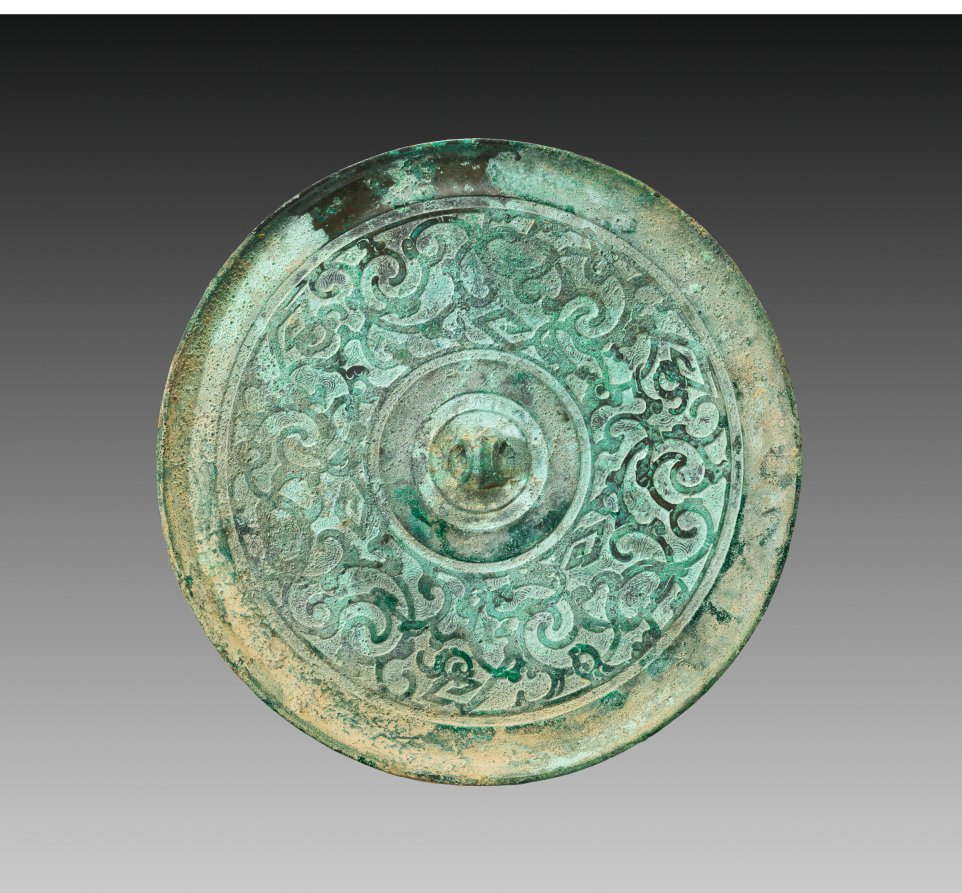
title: Mirror with Serpentine Interlaces and Angular Meanders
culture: China, Warring States period (475–221 BCE)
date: c. 325–275 BCE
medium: bronze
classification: Metalwork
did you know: This museum has the largest collection of Chinese mirrors outside of China.